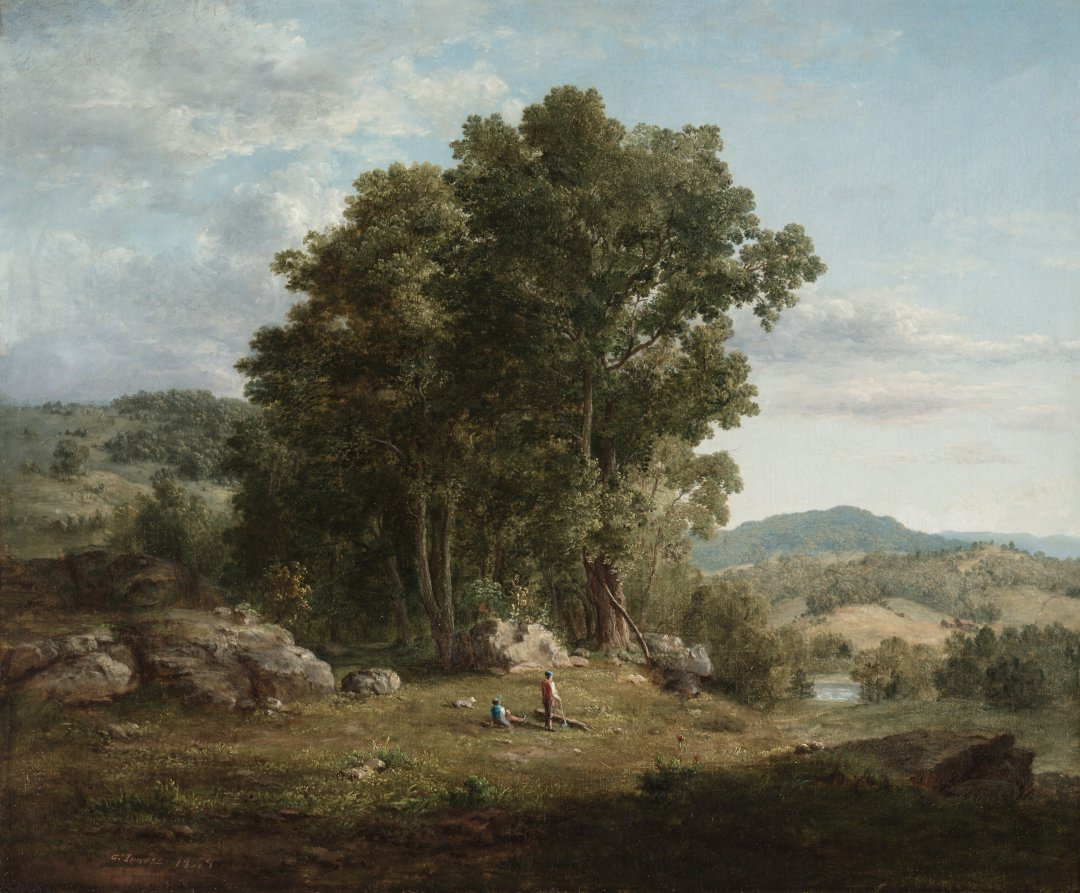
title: The Wood Chopper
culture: America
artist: George Inness (American, 1825–1894)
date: 1849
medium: oil on canvas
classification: Painting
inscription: Signed lower left: "G. Inness 1849"